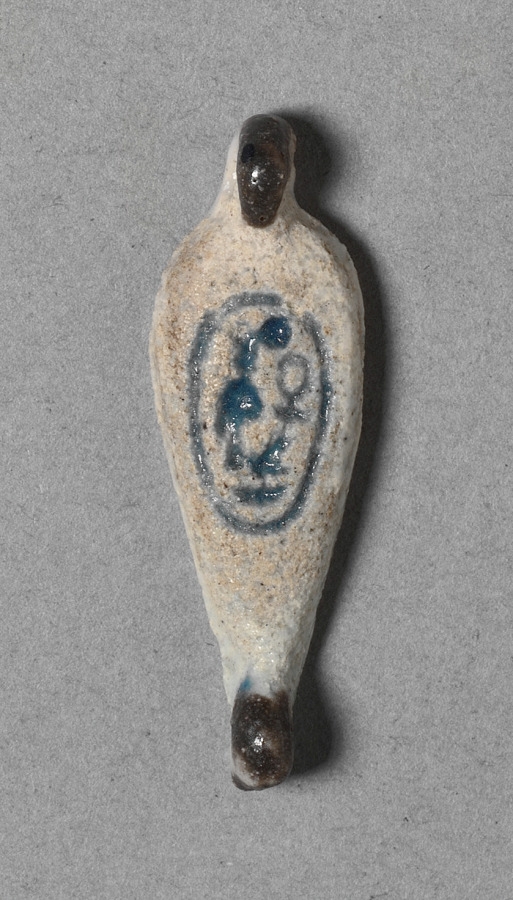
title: Petal-Shaped Bead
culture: Egypt, New Kingdom (1540–1069 BCE), Dynasty 18, reign of Amenhotep III (1390–1352 BCE)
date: c. 1391–1353 BCE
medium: faience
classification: Jewelry